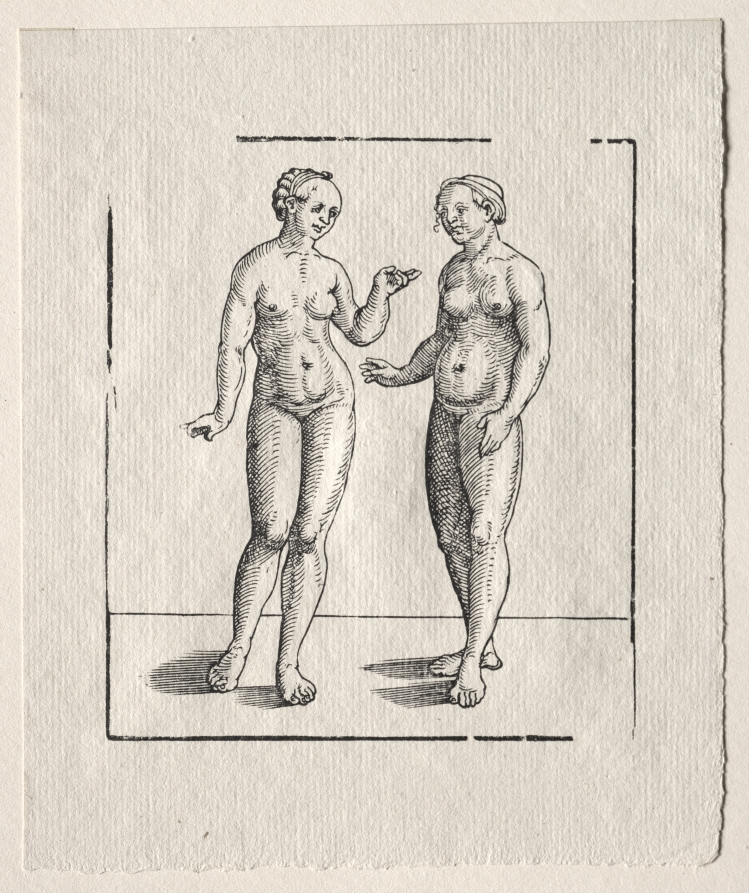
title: Two Nudes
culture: Germany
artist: Erhard Schön (German, c. 1491–1542)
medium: woodcut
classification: Print